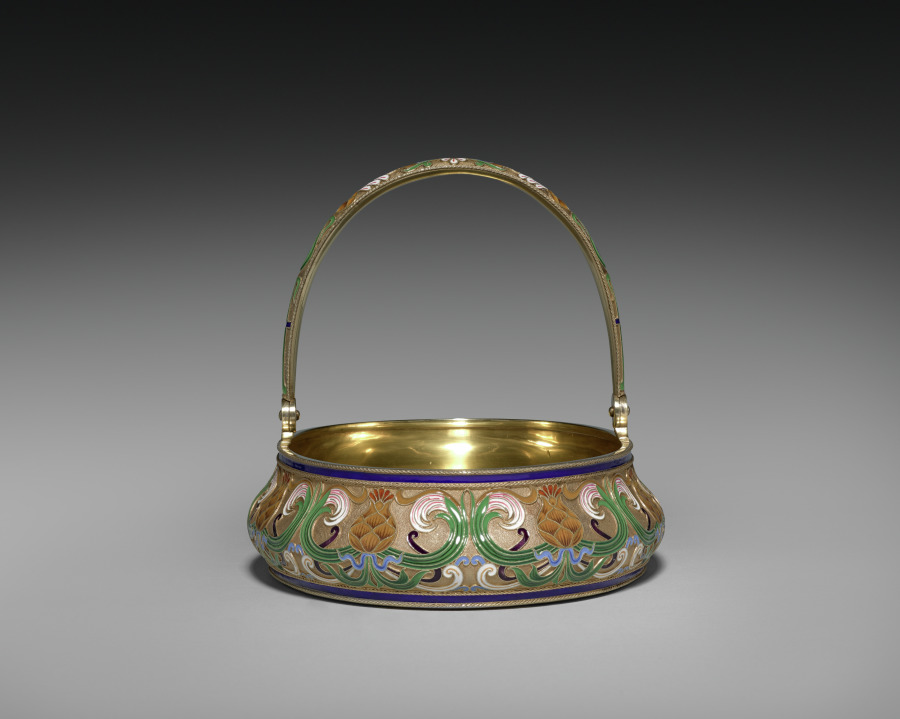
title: Cake Basket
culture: Russia, St. Petersburg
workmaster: attributed to Feodor Ivanovich Rückert (Russian, 1840–1917)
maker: House of Fabergé (Russian, 1842–1918)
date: 1887–96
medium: silver gilt, opaque cloisonné enamel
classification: Miscellaneous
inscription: 88, St. George [assay mark for Moscow, 1882-1896]; C. Fabergé (in Cyrillic); double-headed eagle [imperial warrant]; 10593 scratched.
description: Fabergé’s craftsmen in Moscow, especially under the watchful eye of workmaster Feodor Rückert, became known for their work in the Pan-Slavic or Neo-Russian style, hearkening back to 17th-century motifs of Russian folk art. Often on rather conventional shapes, Rückert and his silversmiths created an explosion of color, achieved through the historic technique of cloisonné enamel in which tiny metal lines are soldered to the surface then filled with glass powders in various colors and fired to create a high gloss finish. The result is a spectacular evocation of the 17th-century originals. Far from mere copies, however, Rückert's designs, such as this tea service, employ naturalistic or abstract motifs in a thoroughly modern adaptation of a remarkable earlier period of Russian art and decoration.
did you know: This cake basket is part of a larger tea service.